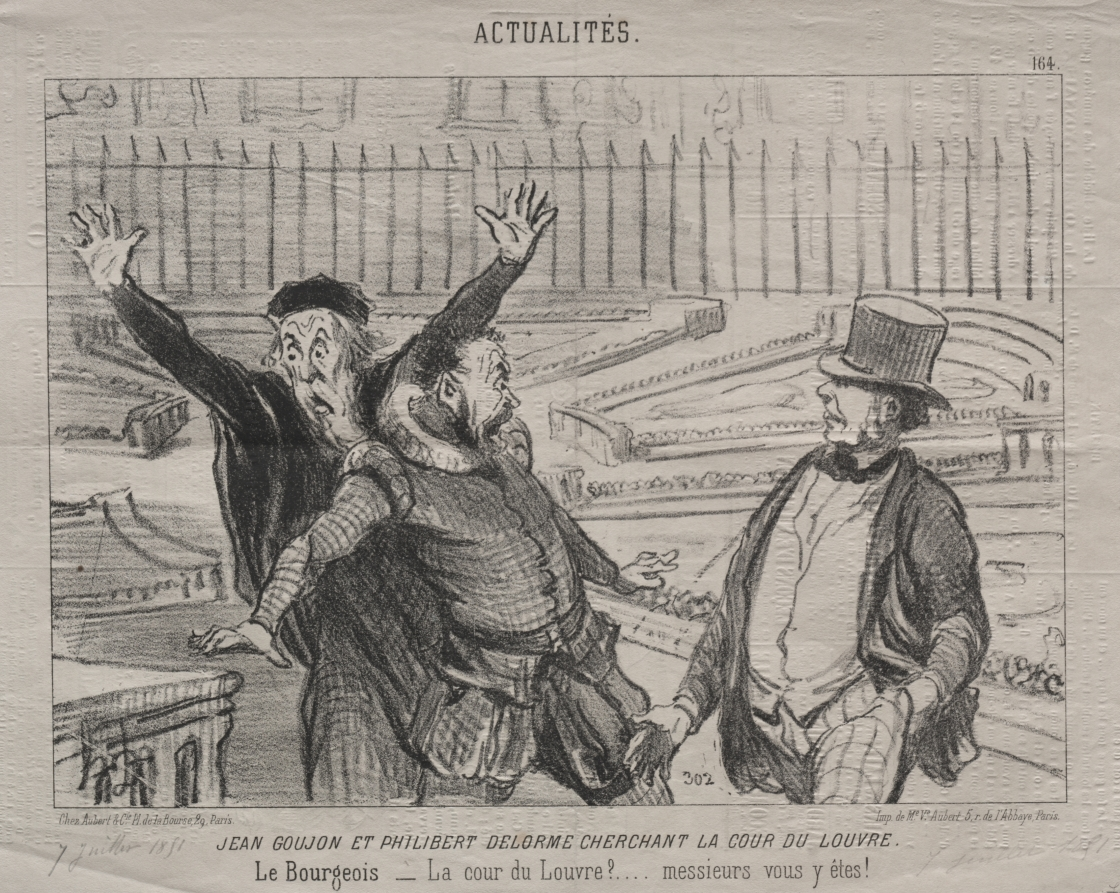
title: Jean Goujon and Philibert Delorme Looking for the Courtyard of the Louvre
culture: France, 19th century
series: News of the Day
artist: Honoré Daumier (French, 1808–1879)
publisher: Aubert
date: 1851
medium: lithograph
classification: Print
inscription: Upper right, pencil: 3539 ; Lower margin, pencil: 7 juillet 1851 / 7 juillet 1851 / fair imp / 4 / Del. vi. 2124, only state Lower margin, printed: Chez Aubert & Cie. Pl. de la Bourse, 29 Paris / Imp. de Me.Ve. Aubert, 5, rue de l'Abbaye, Paris.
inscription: Above image, printed: ACTUALITÉS. / 164. ; Below image, printed: JEAN GOUJON AND PHILIBERT DELORME CHERCHANT LA COUR DU LOUVRE. / Le Bourgeois _ La cour du Louvre?.... messiers vous y êtes!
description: This print was published in Le Charivari (July 7, 1851) as plate 164 from the series News of the Day.